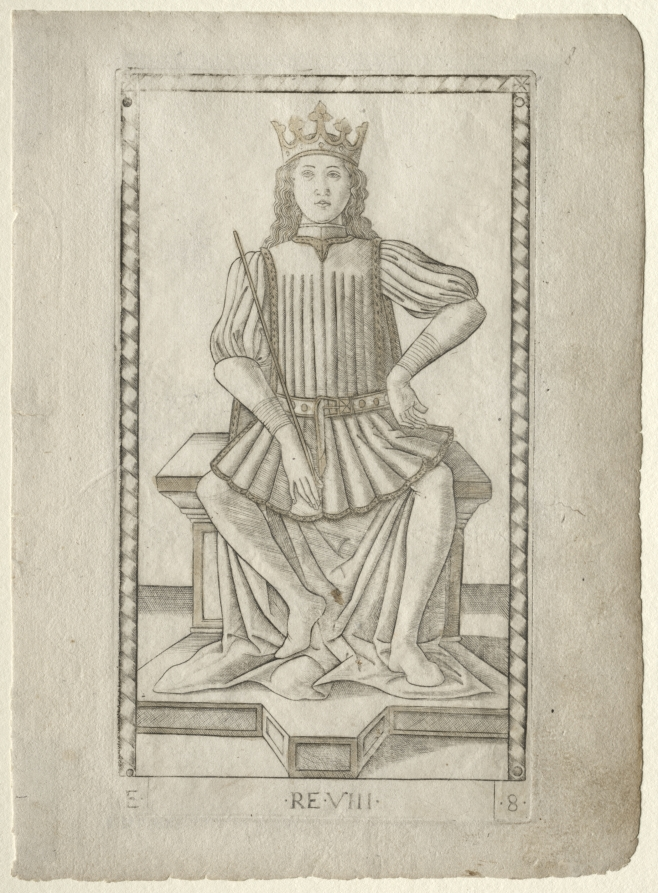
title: The King (from the Tarocchi, series E: Conditions of Man, #8)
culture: Italy, Ferrara, 15th century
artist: Master of the E-Series Tarocchi (Italian, active 1460s)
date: before 1467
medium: engraving hand-colored with gold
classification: Print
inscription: Lettered below the image of Re (The King): E· / ·RE·VIII· / ·8·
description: This engraving is part of the Tarocchi group marked with the letter “E,” and named Conditions of Man. This series outlines the social and hierarchical order of ten characters (Beggar, Servant, Artisan, Merchant, Gentleman, Knight, Doge King, Emperor, and Pope), starting from the lower grade and ending with the most important one. Here, Re (The King) is shown as a full-length crowned male figure, facing front. The ruler is seated on his throne, and holds a scepter with his right hand.